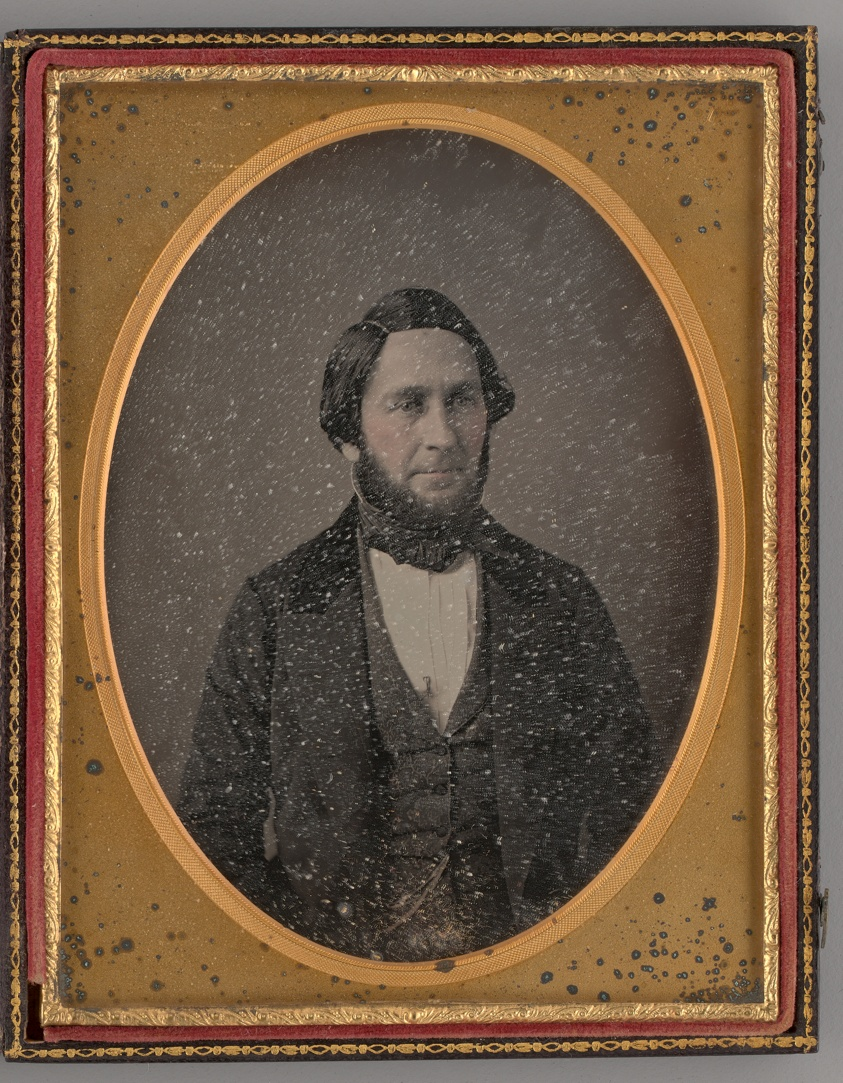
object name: Photograph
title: Untitled (Portrait of Thomas Preston)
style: 19th century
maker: L. H. Hale (American, 1823-1885)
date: 1855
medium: Daguerreotype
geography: United States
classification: portrait; photograph; photographic process; photography; portrait; daguerreotype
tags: lundberg collection, portraits, portraits: male subject, portrait, Male